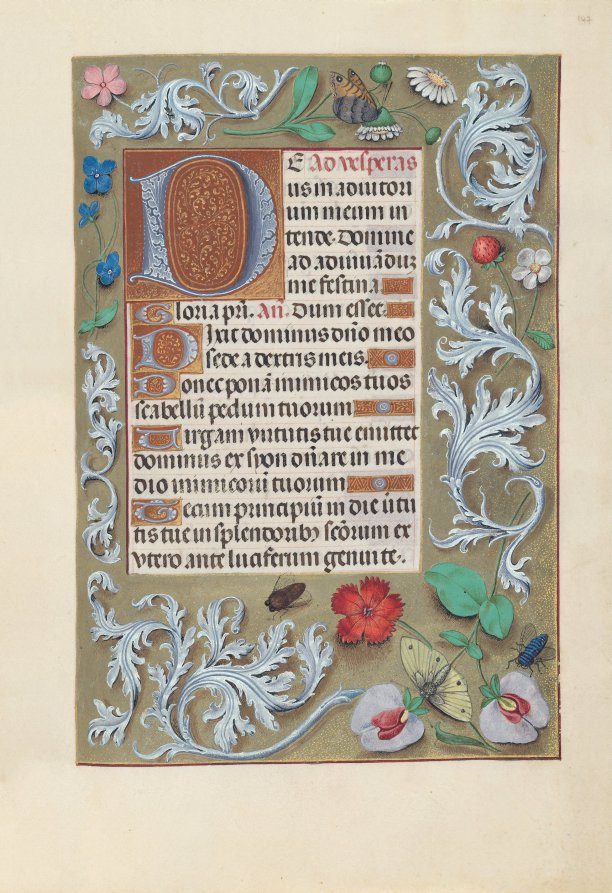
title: Hours of Queen Isabella the Catholic, Queen of Spain: Fol. 147r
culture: Flanders, Ghent and Bruges, late 15th century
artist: Master of the First Prayerbook of Maximillian (Flemish, c. 1444–1519)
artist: and Associates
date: c. 1500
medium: ink, tempera, and gold on vellum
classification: Bound Volume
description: This manuscript was illuminated by a circle of at least five highly organized manuscript painters active in the Flemish cities of Ghent and Bruges. The principal illuminator was Alexander Bening, who painted the majority of the book's miniatures. Manuscripts produced by this circle of artists are renowned for the decoration of their borders, which typically feature a rich variety of realistically-painted flowers, birds, and butterflies. This prayer book, called a book of hours, was intended not for a cleric, but for the private devotions of a lay person-in this case, Isabella the Catholic, Queen of Spain (1451-1504). Isabella's coat of arms embellishes the book's frontispiece. It is unlikely that the book was commissioned by the Queen herself; rather, she probably received it as a diplomatic gift from someone courting her patronage, perhaps Cardinal Francisco Jimenez de Cisneros. A Franciscan friar, Jimenez was dependent upon Isabella for his advancement, first to the post of Queen's confessor in 1492, and then to Archbishop of Toledo in 1495.